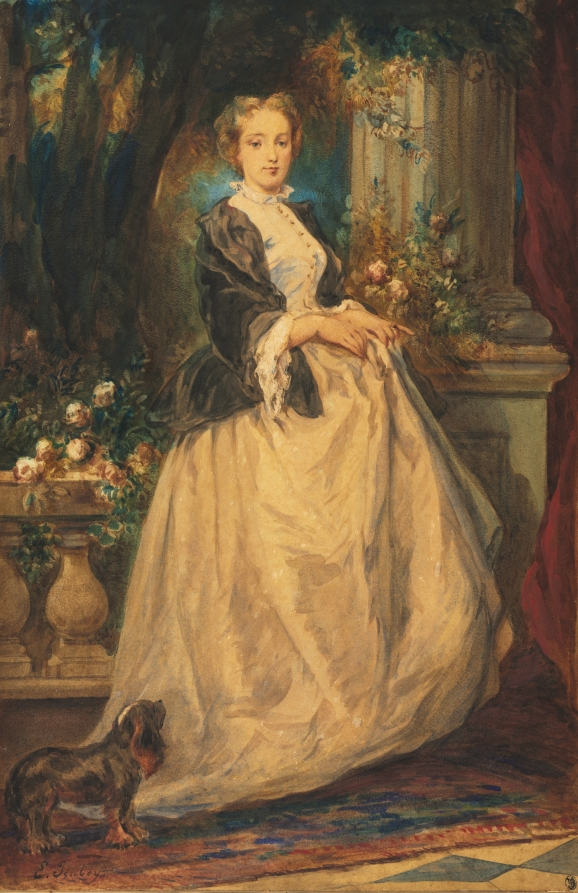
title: Portrait of Madame Thomas (née Camille Boucher)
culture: France, 19th century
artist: Eugène Isabey (French, 1803–1886)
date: c. 1824–86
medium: watercolor with graphite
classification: Drawing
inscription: inscribed in black ink, lower left: "E. Isabey"